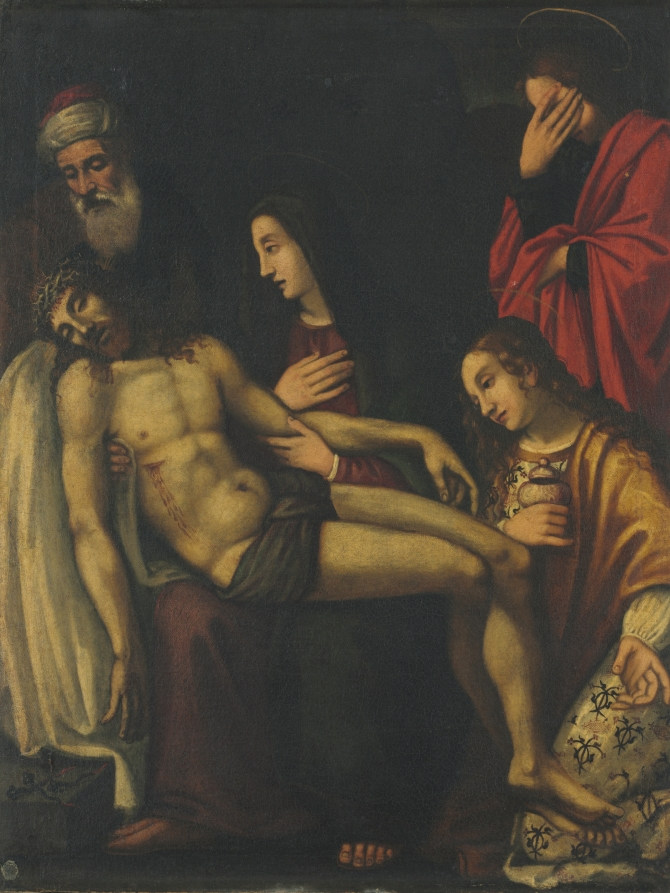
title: Pietà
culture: possibly Italy, Florence, late 16th century, or later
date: late 1500s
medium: oil on canvas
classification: Painting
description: Originating in Germany in the 1300s, the intense moment of lamentation, often referred to as a pietà, has no origin in the Bible. Though it was more widespread in northern Europe, the poignant scene of Mary holding the body of her deceased son expanded into Italy as well. In this painting, Nicodemus supports Christ's upper body, Mary clasps her son's elbow as he lies across her lap, Mary Magdalene kneels at Christ's feet, and John the Apostle covers his face in grief behind her. The crown of thorns upon Christ's head and the blood still visible from his wounds recall the events of the Passion and highlight the sorrow of the Virgin.